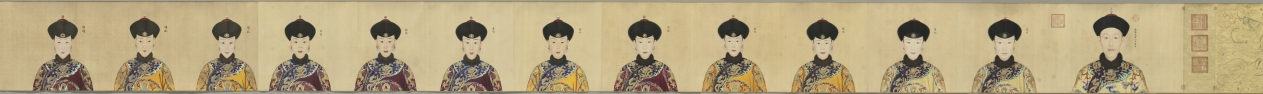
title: Portraits of the Qianlong Emperor and His Twelve Consorts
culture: China, Qing dynasty (1644–1911), Qianlong reign (1736–95)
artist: Giuseppe Castiglione (Italian, 1688–1766)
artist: and others (Chinese)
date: 1736–70s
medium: Handscroll; ink and color on silk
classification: Painting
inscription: 9 seals of the Qianlong emperor (r. 1736–95).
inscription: The eighth month, first year of Qianlong [1736] 乾隆元年八月吉日. The Empress (Xiaoxian) 皇后 (1712–1748), The Guifei (Huixian) 貴妃 (?-–1745), Chunfei 純妃 (1713–1760), Jiafei 嘉妃 (?–1755), Lingfei 令妃 (1727–1775), Shufei 舒妃 (1728–1777), Qingbin 慶嬪 (1724–1774), Yingbin 穎嬪 (1731–1800), Xinbin 忻嬪 (?–1764), Dunfei 惇妃 (1746–1806), Xunfei 順妃 (1749–1788), Shunbin 循嬪 (?–1797).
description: This portrait shows the Qianlong emperor at 26, in the first year of his reign. His likeness is followed by portraits of the empress and eleven consorts. Their portraits document the appearances of the court women around the time when they received their respective imperial titles, which occurred at different stages of the emperor's life. The first three portraits were done by the Jesuit (Roman Catholic) missionary artist Giuseppe Castiglione, whereas the later ones were by Chinese court painters. Formal portraiture contributed to the affirmation of status and construction of role and identity. This scroll served as both familial documentation and a "mind picture" of the Qianlong emperor, suggesting that his constructed image of emperorship was inseparable from concepts of self and family. It was stored in a carved red lacquer box bearing the original painting title Mind Picture of a Well-Governed and Tranquil Reign (see CMA 1969.32).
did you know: Lingfei 令妃 (1727–1775), the first consort depicted in the maroon or “incense-colored" 香色 robe, was the mother of six of Qianlong’s children, including the future Emperor Jiaqing.